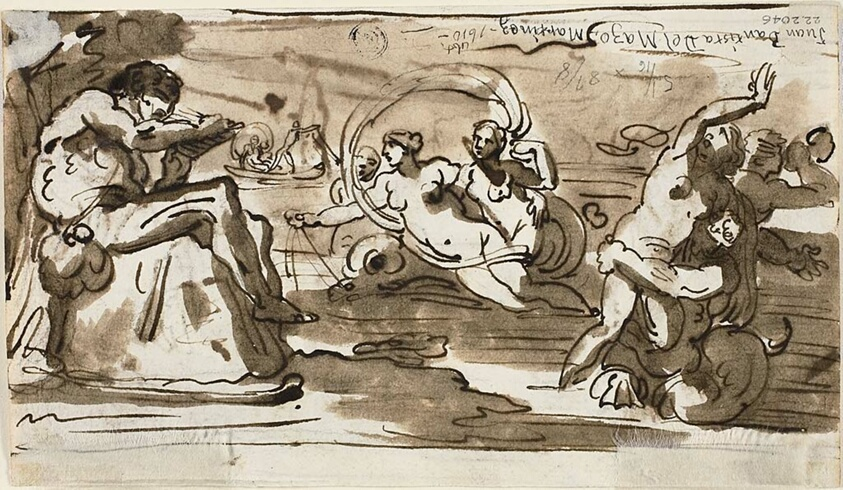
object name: Drawing and Watercolor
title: Polyphemus Throwing Boulders at the Fleeing Aeis and Galatea (recto); Polyphemus Playing His Reed Pipes for Galatea (verso)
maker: Pobably Felice Giani (Italian, 1758-1823); or possibly Fortunato Durati (Italian, 1787-1863); or possibly Juan Bautista Martinez del Mazo (Spanish, 1612-1667)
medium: Pen and brown ink and brush and brown wash, over touches of black chalk (recto and verso), on ivory laid paper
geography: Italy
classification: pen and ink drawings; drawings (visual works); prints and drawing